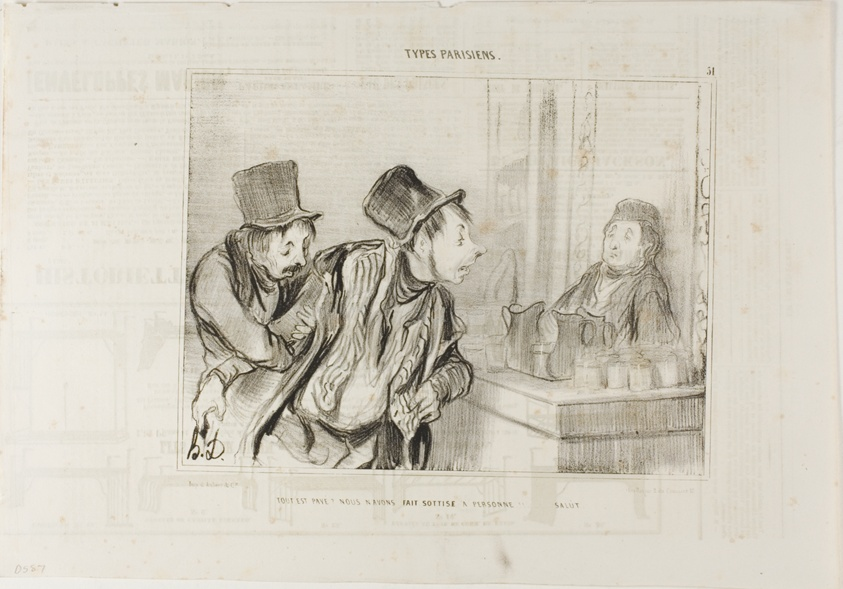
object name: Print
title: “Everything is Paid for? And We Didn't Insult Anyone… Bye,” plate 31 from Types Parisiens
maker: Honoré Victorin Daumier; French, 1808-1879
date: published June 4, 1842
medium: Lithograph in black, with scraping on stone on cream wove paper, with text added in another hand and letterpress verso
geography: France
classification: lithograph; print; prints and drawing